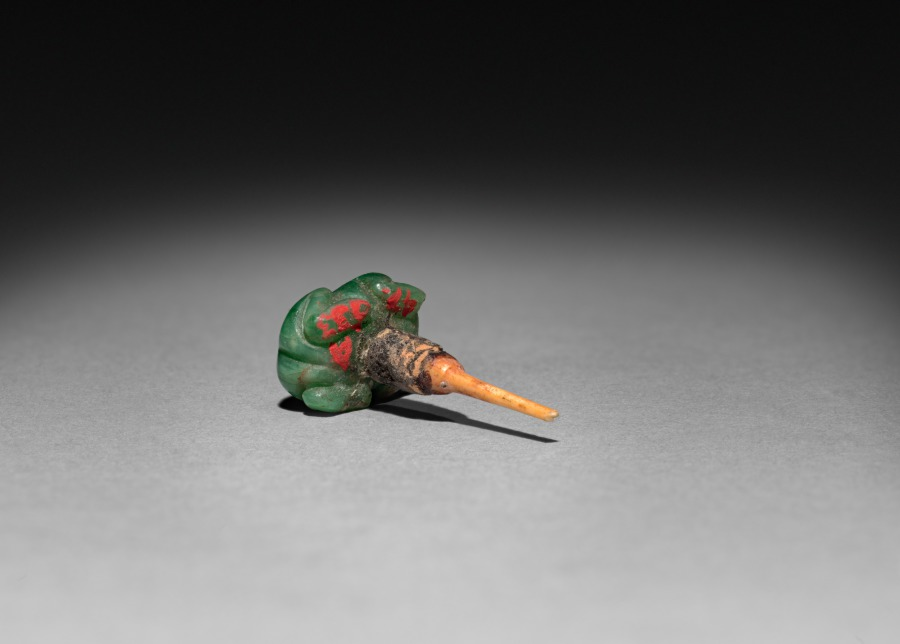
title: Snuff Bottle with Stopper (stopper)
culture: China, Qing dynasty (1644-1911)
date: 1800s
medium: jade, ivory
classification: Stone